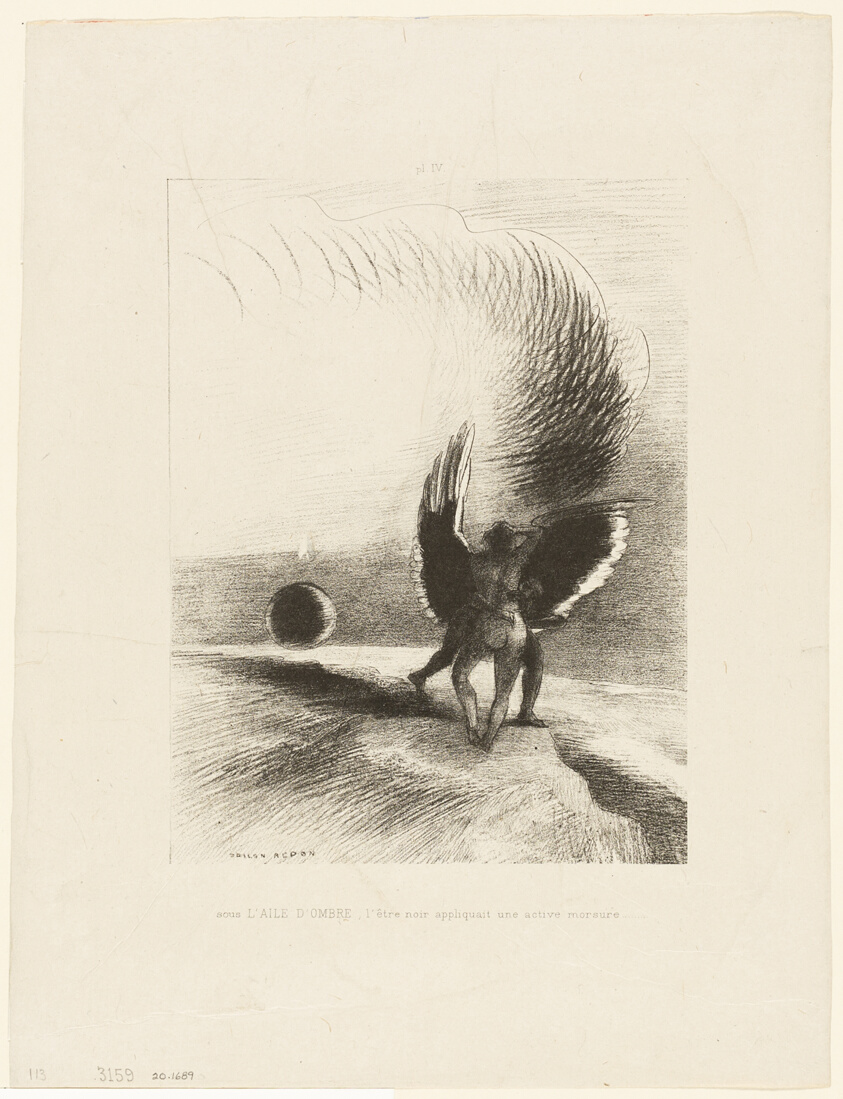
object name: Print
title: Beneath the Wing of a Shadow the Black Creature was Biting Energetically, plate 4 of 6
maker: Odilon Redon (French, 1840-1916)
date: 1891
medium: Lithograph in black on light gray chine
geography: France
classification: lithograph; print; prints and drawing; paper